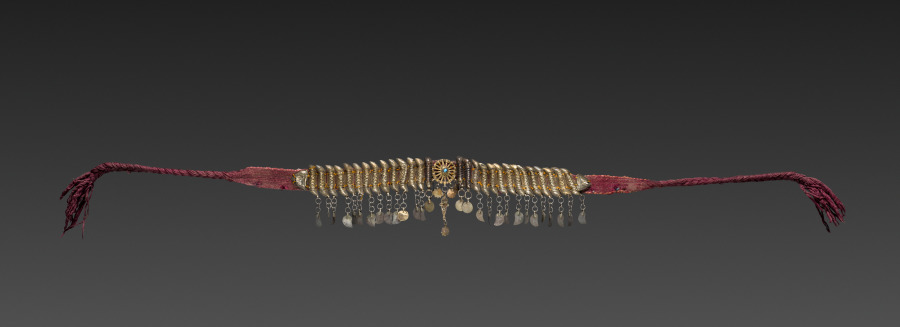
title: Necklace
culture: Bulgaria, 19th century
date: 1800s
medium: silver gilt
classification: Jewelry